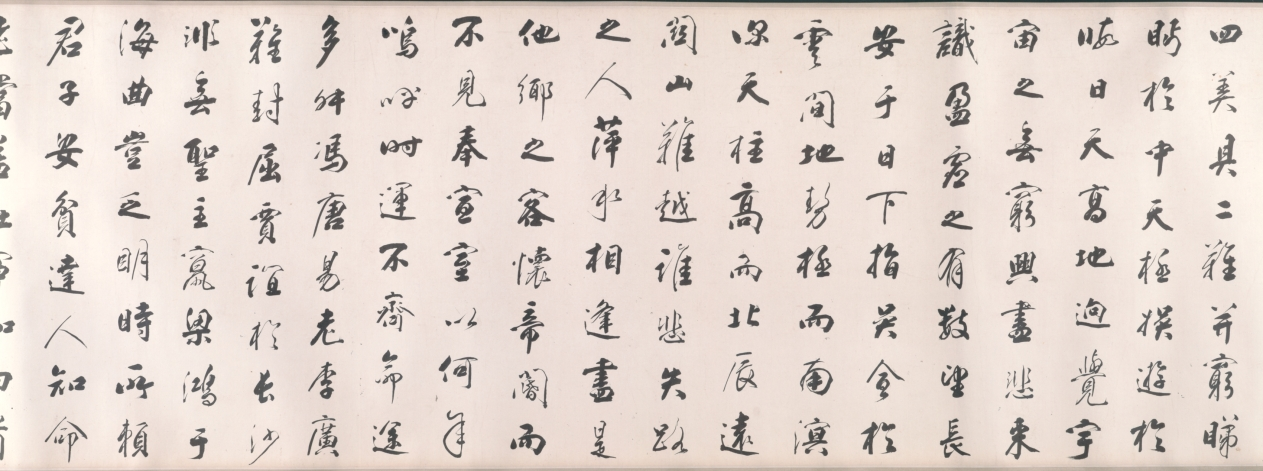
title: Calligraphy in Running Style based on Wang Bo's Essay on Tengwang Pavilion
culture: China, Changbai, Qing dynasty (1644-1911)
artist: Tiebao (Chinese, 1752–1824)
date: 1811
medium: handscroll, ink on paper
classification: Calligraphy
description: A member of the Donggo clan, Tiebao belonged to the Manchu Plain Yellow Banner army. As an official in the Qing court, he endured considerable vicissitude and his career was never smooth. Celebrated as a man of letters, he oversaw the publications of the Manchu military system as well as an anthology of poems by members of the imperial family and other Manchu dignitaries. In calligraphy, he was regarded as the equal of such eighteenth-century luminaries as Liu Yong (1720-1805) and Weng Fanggang (1733-1818). This handscroll is a work of his mature years and is exemplary of his disciplined and highly subtle approach to the art of calligraphy.